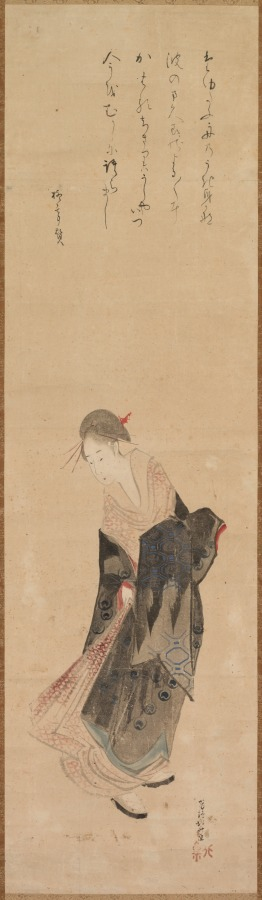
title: Beauty (Bijin)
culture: Japan, Edo period (1615–1868)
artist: Katsushika Hokusai (Japanese, 1760–1849)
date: c. 1775–1849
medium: hanging scroll; ink and color on paper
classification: Painting